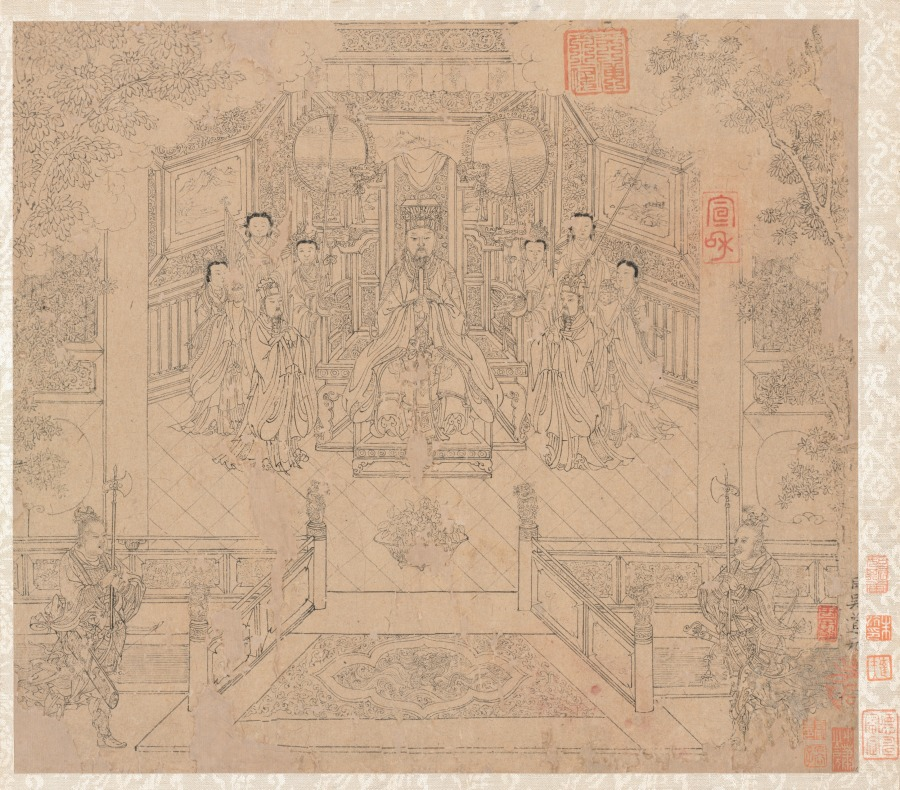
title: Album of Daoist and Buddhist Themes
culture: China, Southern Song dynasty (1127-1279)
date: 1200s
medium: Album of fifty leaves; ink on paper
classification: Painting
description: This extraordinary album has 50 paintings on a variety of religious subjects. They were likely created by several master craftsmen to share with studio apprentices as models for fulfilling commissions. The Jade Emperor and the Daoist pantheon make up the first 26 leaves. The next 14 leaves portray the Buddhist Ten Kings of Hell administering punishments to the dead. The third section, called “Clearing the Mountains,” features divine soldiers, led presumably by the deity Erlang Shen 二郎神, fighting undesirable creatures.